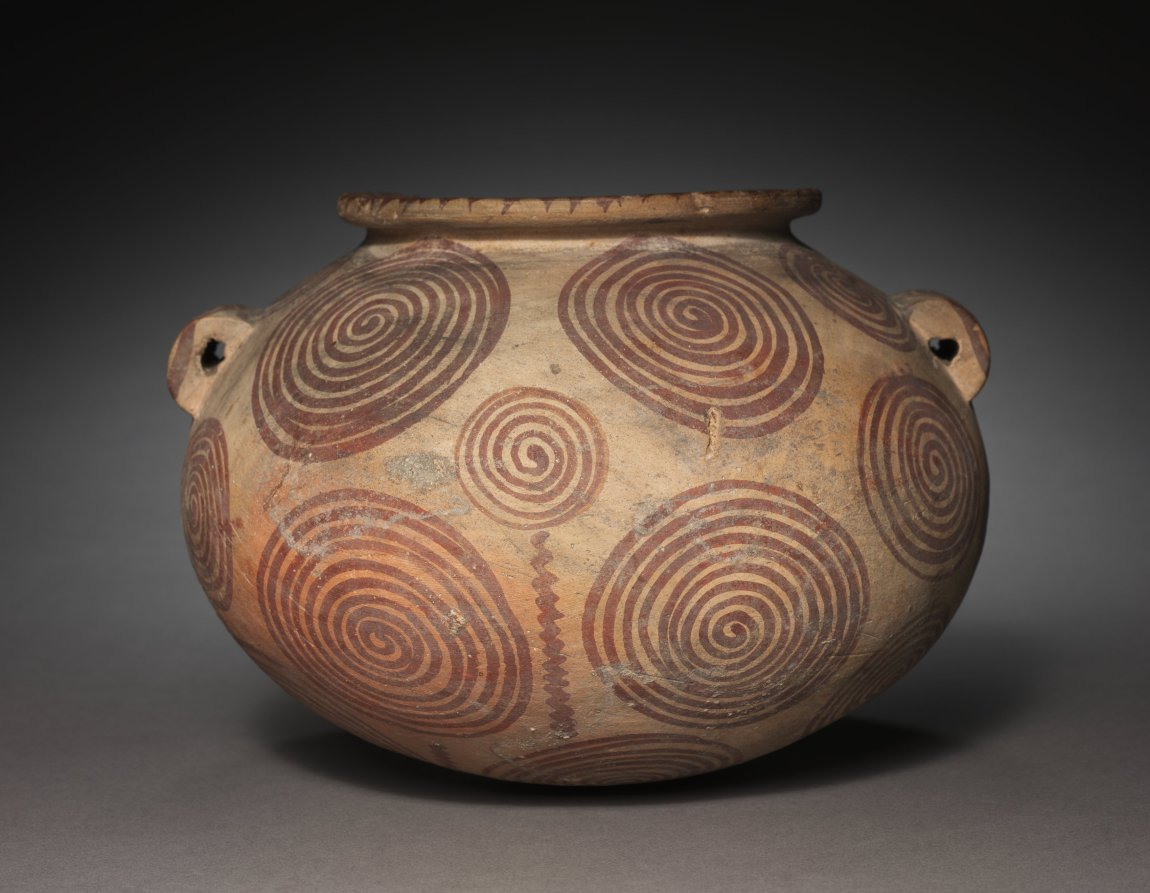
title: Squat Jar with Lug Handles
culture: Egypt, Predynastic (5000–2950 BCE), Naqada IIb (3650–3300 BCE)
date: 4000–3000 BCE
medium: marl clay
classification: Vessels